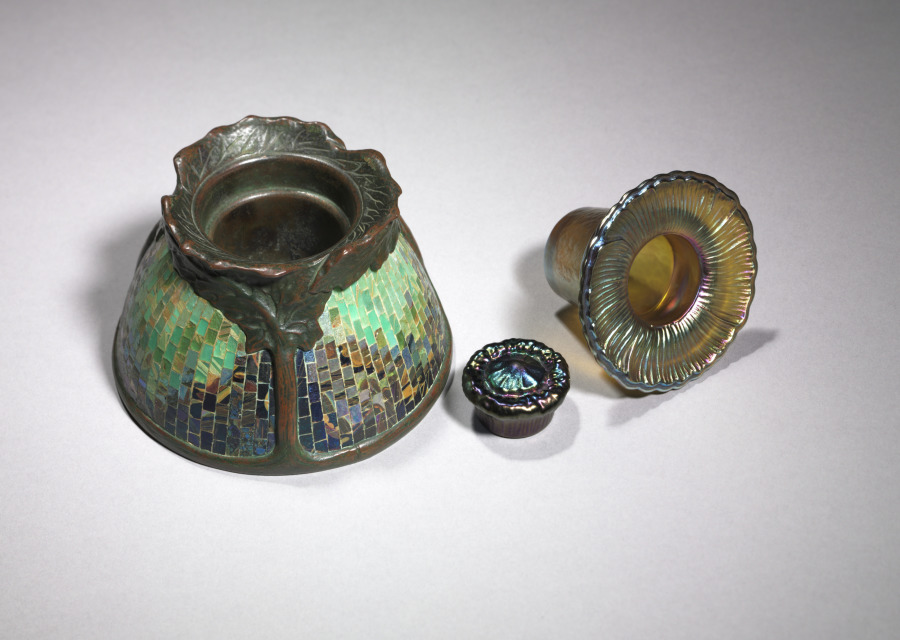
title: Poppy Inkwell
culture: America, New York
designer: attributed to Clara Wolcott Driscoll (American, 1861–1944)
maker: Tiffany Glass & Decorating Company (America, New York, 1892–1902)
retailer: Tiffany Studios (United States, New York, 1902–32)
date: c. 1898–1906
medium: favrile glass mosaic, bronze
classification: Glass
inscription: stamped on underside: 28289/Tiffany Studios/New York/TGDCo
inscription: engraved on underside of insert: L.C.T. Favrile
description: By 1900 Louis Comfort Tiffany had expanded his empire by increasing the firm’s production of “fancy goods,” including inkstands, candlesticks, clocks, small boxes, desk sets, tea screens, and other functional objects. Along with the array of artistic glass designs from his factory in Corona, Queens, works in ceramic, bronze, other metals, and even jewelry abounded. These smaller, more affordable luxury items were designed with as much thought to artistry as the great stained glass windows and lamps through which the firm enjoyed unrivaled success.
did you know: More than a thousand tiny pieces of glass form the mosaic design of this inkwell.